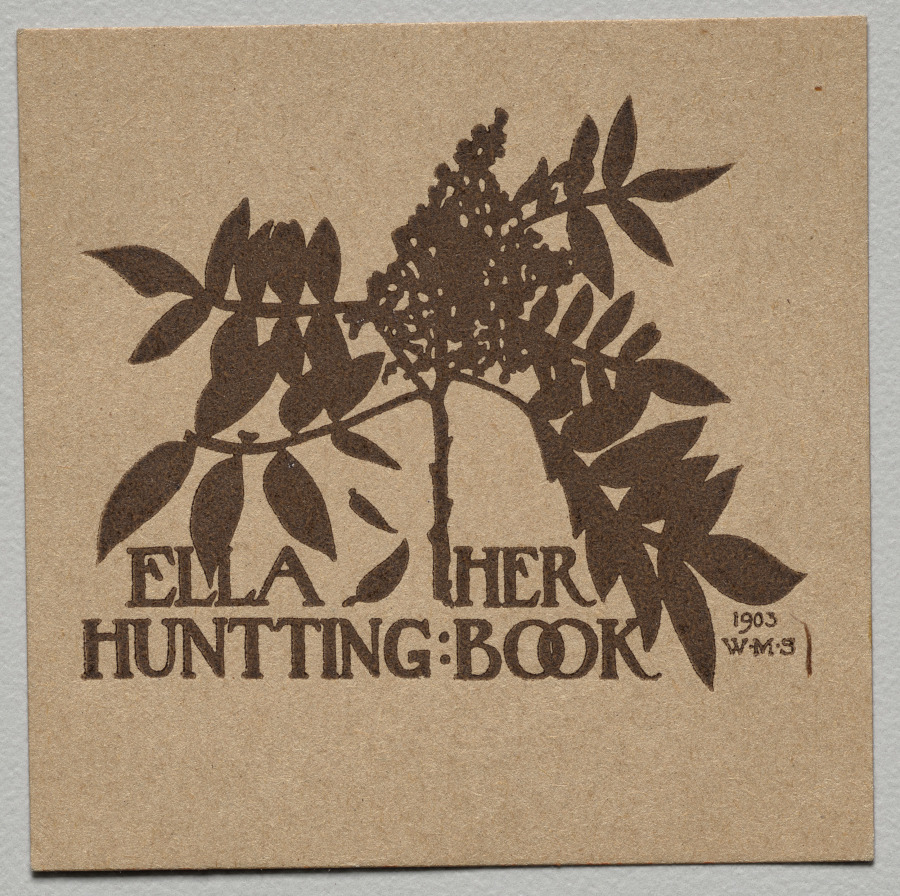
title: Bookplate: Ella Huntting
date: 1903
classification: Print